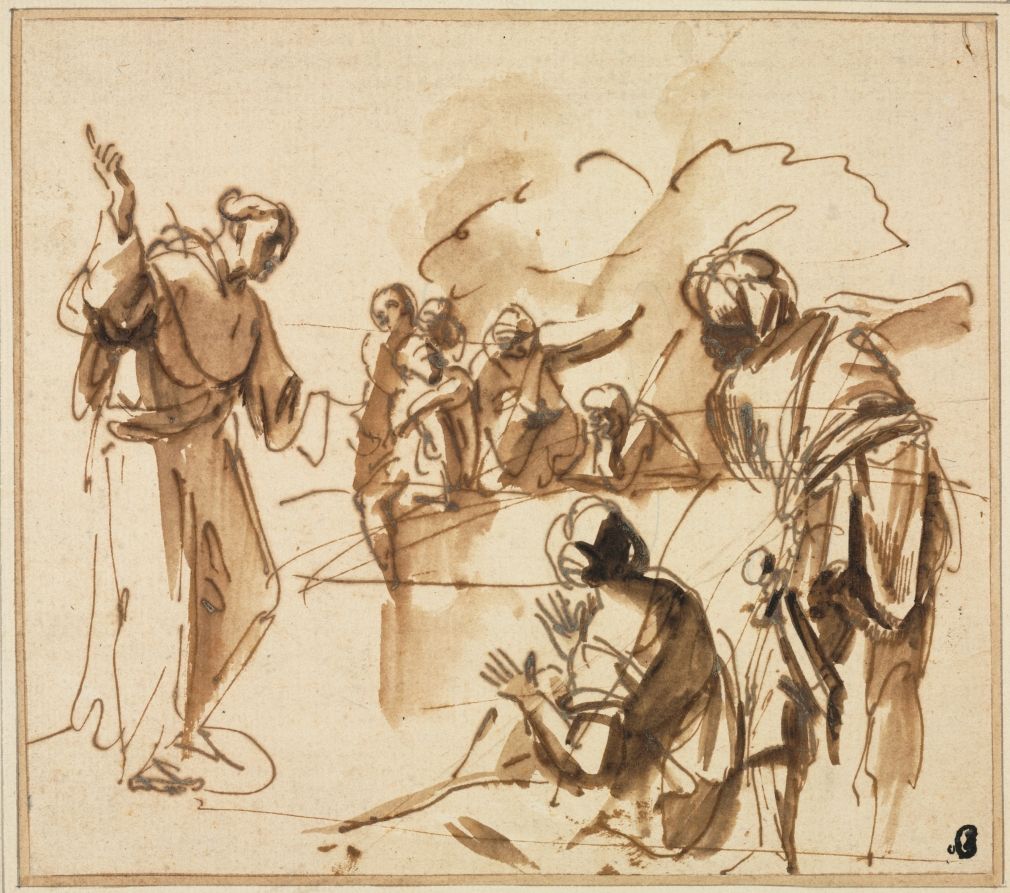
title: A Monk Preaching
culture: Italy, 17th century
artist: Pier Francesco Mola (Italian, 1612–1666)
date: mid 17th century?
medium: pen and brown ink (iron gall?) and brush and brown wash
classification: Drawing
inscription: VERSO OF SECONDARY SUPPORT, upper right, in graphite: 2. ; lower left, in blue ballpoint pen: C = ; lower left and lower center, in graphite: P. Crozat[t?] (1661-1740) Lugt 474